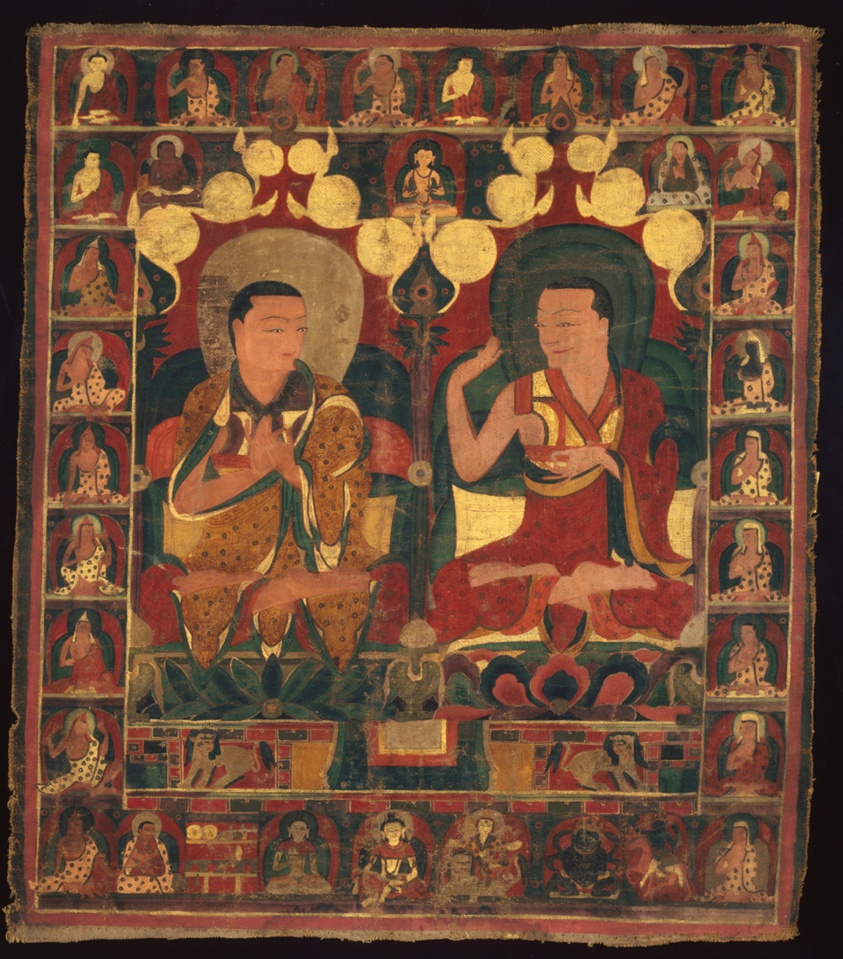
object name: Painting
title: Painted Banner (Thangka) of Lineage Painting of Two Lamas in Debate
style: Himalayan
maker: Tibet; Central Tibet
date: c. 1500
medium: Pigment on cloth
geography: Tibet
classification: painting; asian art